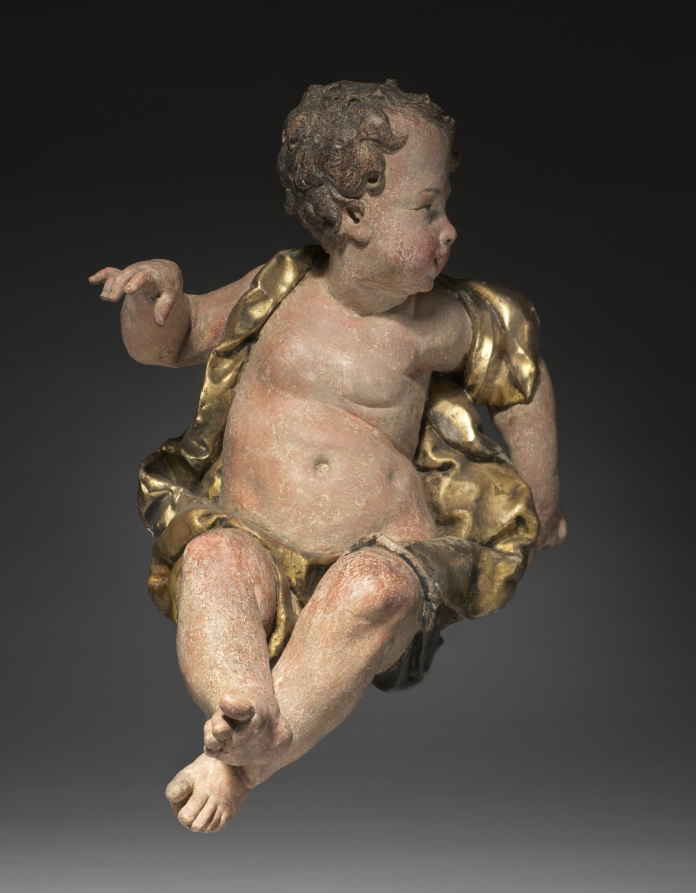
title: Putto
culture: Germany, near Bamberg, 18th century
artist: Ferdinand Tietz (Austrian, 1708–1777)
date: mid-1700s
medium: painted and gilded wood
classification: Sculpture